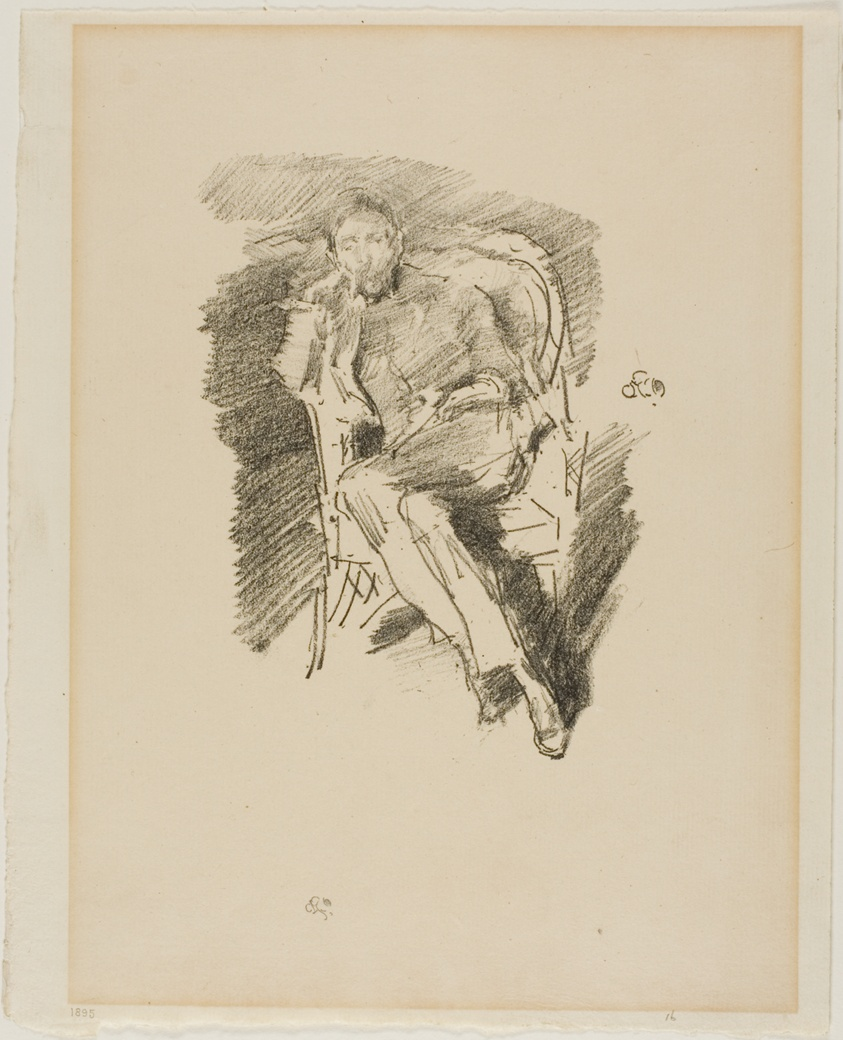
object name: Print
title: Firelight: Joseph Pennell, No. 2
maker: James McNeill Whistler (American, 1834-1903)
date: 1896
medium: Transfer lithograph in black on cream laid paper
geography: United States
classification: transfer lithograph; lithograph; print; prints and drawing; paper